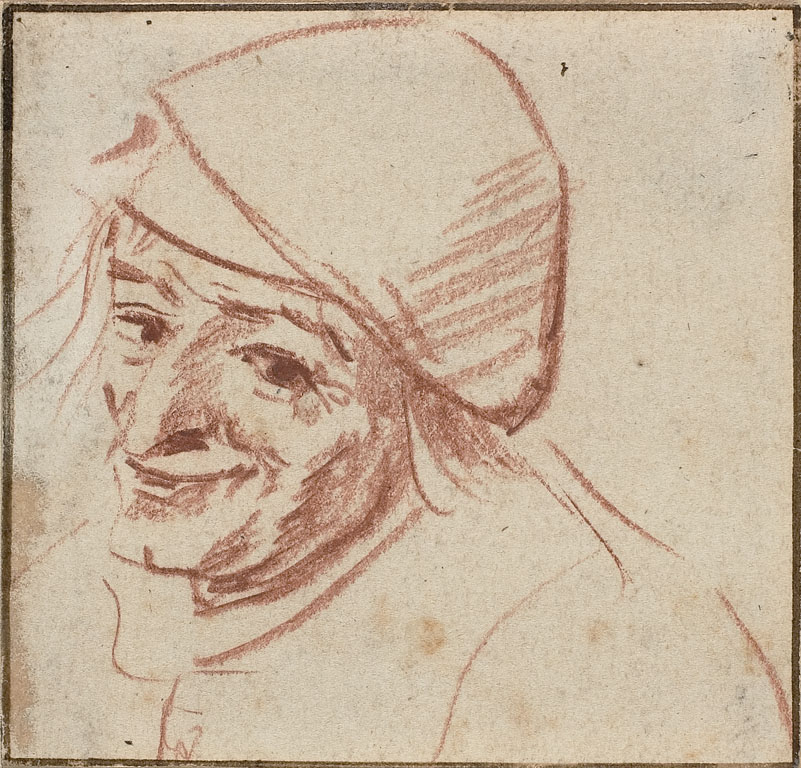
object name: Drawing and Watercolor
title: Head of a Peasant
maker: Egbert van Heemskerk, the elder (Dutch, c. 1634-1704)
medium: Red chalk on ivory laid paper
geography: Holland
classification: chalk; drawings (visual works); prints and drawing